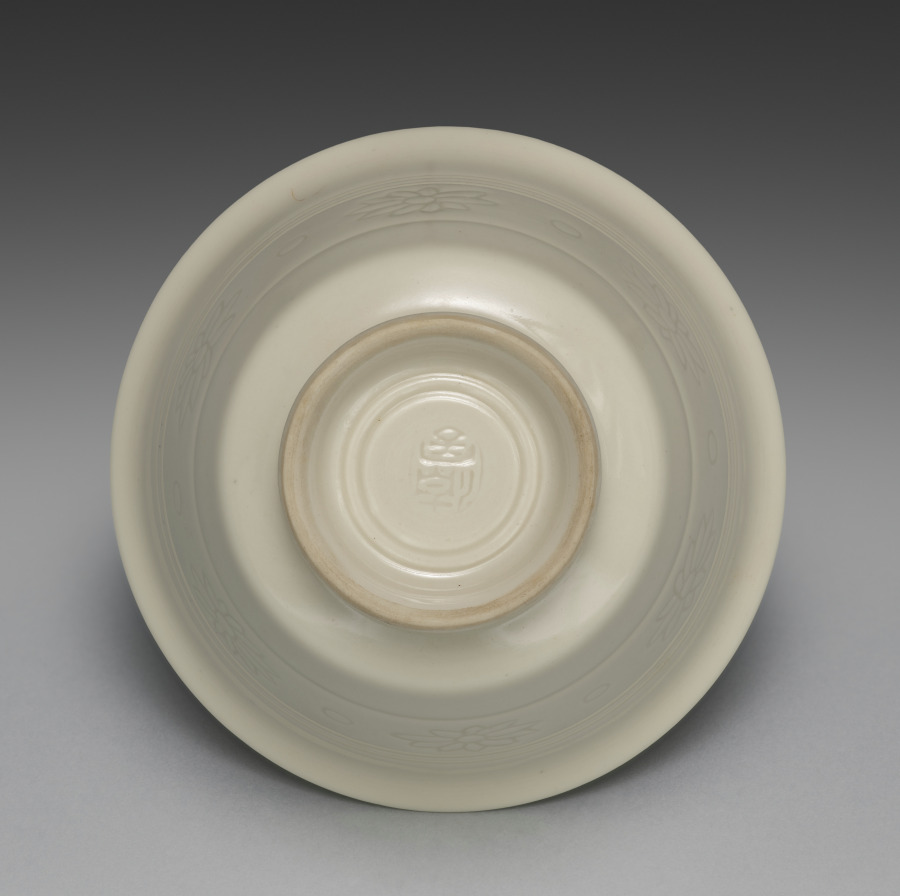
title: Teacup from Teacups with Floral Band Motif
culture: Japan, Meiji period (1868–1912)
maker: Seifū Yohei III (Japanese, 1851–1914)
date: 1893–1914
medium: One from a set of five cups; porcelain with incised decoration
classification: Ceramic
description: The five sencha teacups in this set are decorated with incised flowers and dots between a double band at the top and a single band at the bottom. They are in Yohei III’s creamy taihakuji body and glaze. In their motifs, they are quite similar to an incense burner by Yohei III (see CMA 2022.180), but the flowers are even more simple in design, with no open circle at the center. A label affixed to the side of the box refers to them as “sencha cups in emulation of Korean white [ware].” The reference to Korean ware indicates that even though Yohei was more directly inspired by Qing-dynasty wares from the Dehua kilns in Fujian Province in developing his porcelain clay and glaze for works such as these, the general understanding of the continental models still placed them, at least in terms of color, among pieces broadly associated in Japan with Korean white wares. The delicate cups are thinly potted, so they have a highly desirable translucency.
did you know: The delicate cups in this set are thinly potted, so they have a highly desirable translucency.